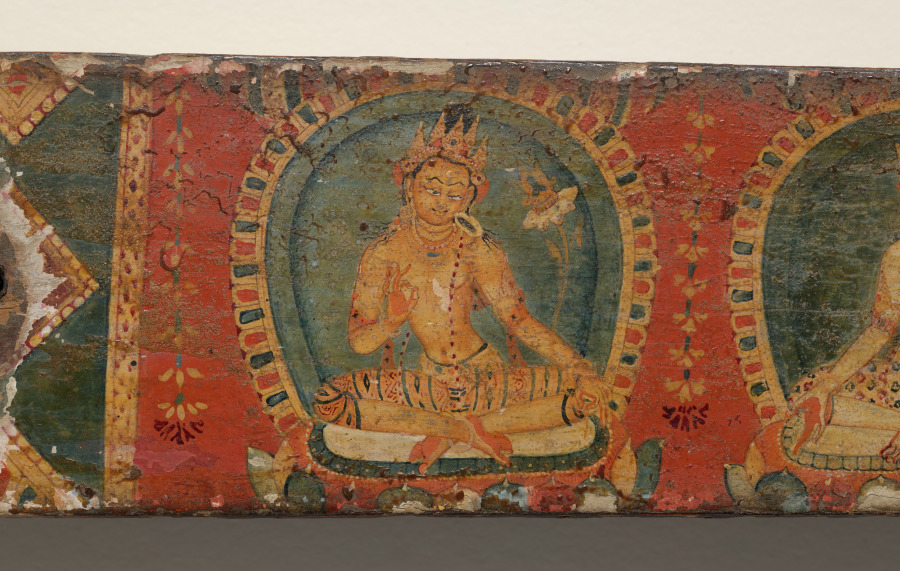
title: Four bodhisattvas and two attendants flanking Vajrasattva, bottom cover, from a Manuscript of the Perfection of Wisdom in Eight Thousand Lines (Ashtasahasrika Prajnaparamita-sutra)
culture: Eastern India, Bihar, Vikramashila Monastery. Painting: Nepal, Kathmandu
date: Sunday, September 14, 1119 (year 239 of the Newar Samvat in the month of Ashvina)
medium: Gum tempera, paper, and colors on wood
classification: Painting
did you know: The diamond pattern at the holes references the ribbons and cords that would have bound the book together.